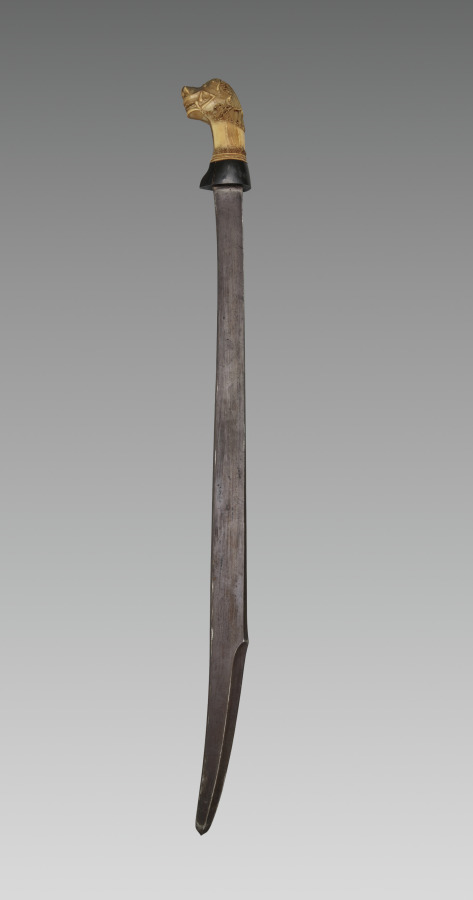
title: Sword and Scabbard (sword)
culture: Java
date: 1700s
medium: steel and ivory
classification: Arms and Armor